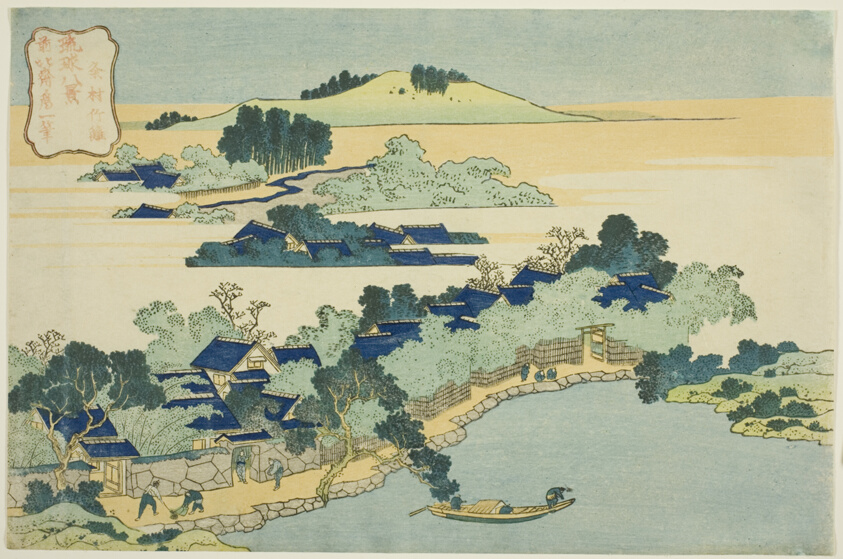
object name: Print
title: Bamboo Grove at Kume Village (Kumemura no chikuri), from the series “Eight Views of Ryukyu Islands (Ryukyu hakkei)”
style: Japanese (culture or style)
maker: Katsushika Hokusai 葛飾 北斎; Japanese, 1760-1849; Publisher: Isaya Rihei; Japanese, Unknown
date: c. 1832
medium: Color woodblock print; oban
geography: Japan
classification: woodblock print; print; asian art